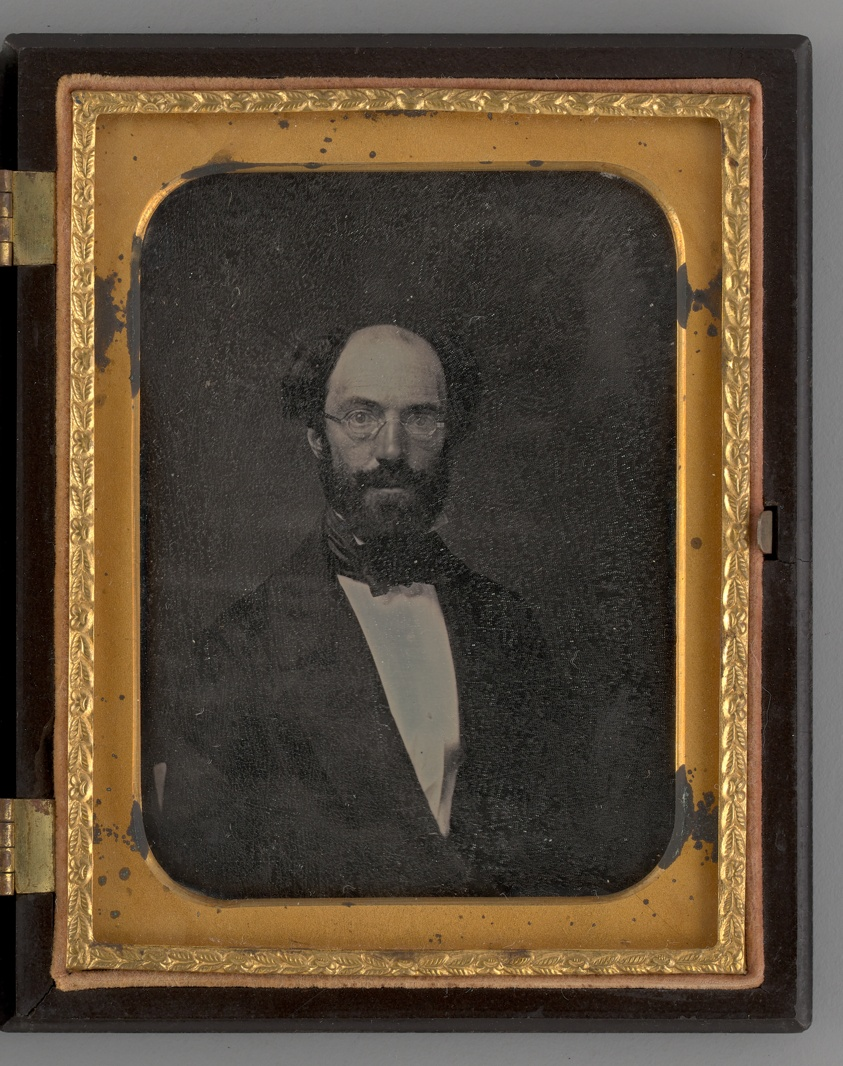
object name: Photograph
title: Untitled (Portrait of a Man)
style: 19th century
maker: Unknown maker; American, 19th century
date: 1861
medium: Daguerreotype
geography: United States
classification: portrait; photograph; photographic process; photography; portrait; daguerreotype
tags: lundberg collection, Male, portrait, portraits, portraits: male subject